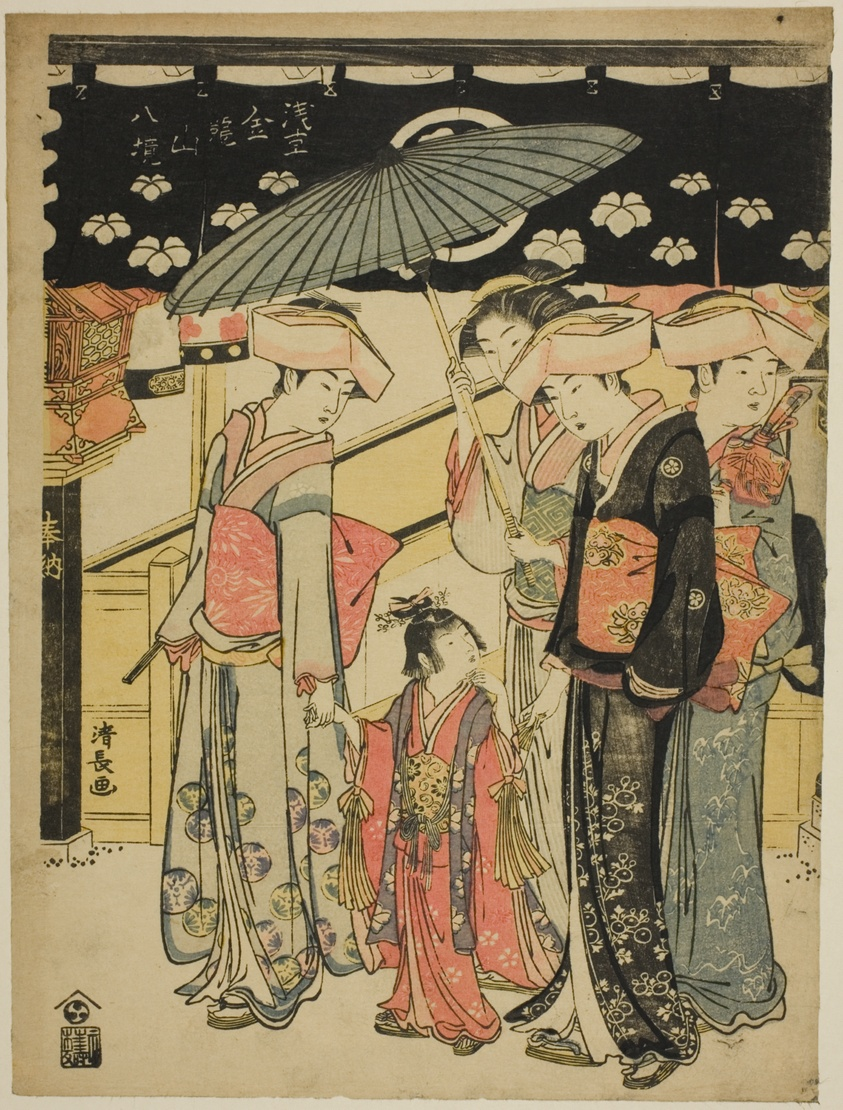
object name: Print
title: The Nakamise Shopping Street, from the series "Eight Precincts of the Kinryuzan Temple in Asakusa (Asakusa Kinryuzan hakkei)"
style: Japanese (culture or style)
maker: Torii Kiyonaga (Japanese, 1752-1815)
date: c. 1782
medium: Color woodblock print; chuban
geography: Japan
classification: woodblock print; print; asian art